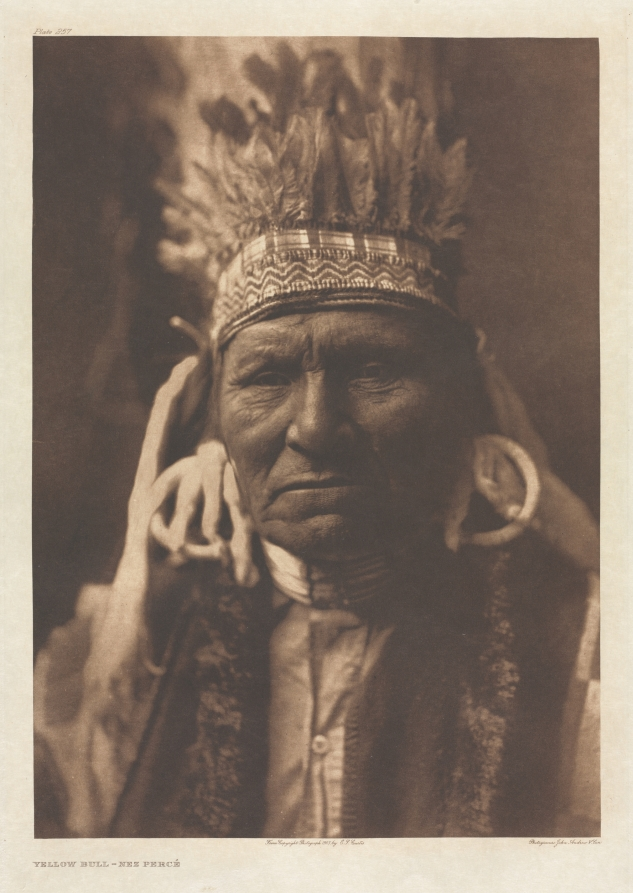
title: Portfolio VIII, Plate 257: Yellow Bull - Nez Percé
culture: America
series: The North American Indian: being a series of Portfolios picturing and describing the Indians of the United States, the Dominion of Canada, and Alaska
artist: Edward S. Curtis (American, 1868–1952)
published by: The University Press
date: 1905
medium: photogravure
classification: Portfolio